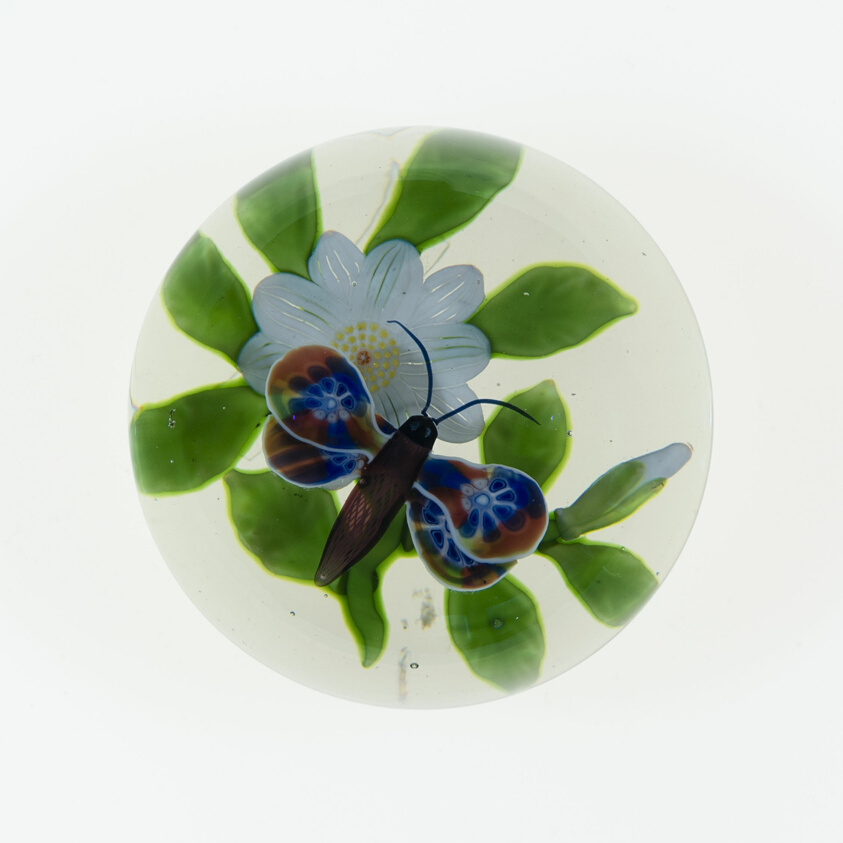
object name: Glass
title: Paperweight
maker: Baccarat Glassworks (Cristalleries de Baccarat); Lorraine, France, founded 1764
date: c. 1845–60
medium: Glass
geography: Baccarat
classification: paperweight; glass